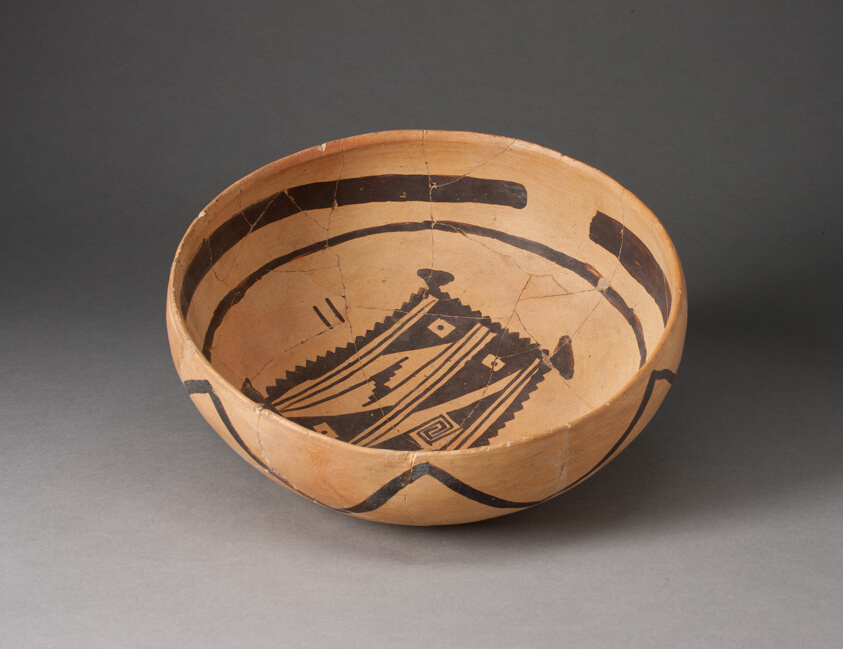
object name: Vessel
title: Bowl with Abstract, Geometric Rendering of Blanket on Interior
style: hopi, anasazi, Pre-Columbian, americas, southwest, pueblo, Arts of the Americas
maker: Hopi, Jeddito Black-on-yellow; Northeastern Arizona, United States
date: 1400–1600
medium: Ceramic and pigment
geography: Arizona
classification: bowl; earthenware; ceramics; vessel; art of the americas